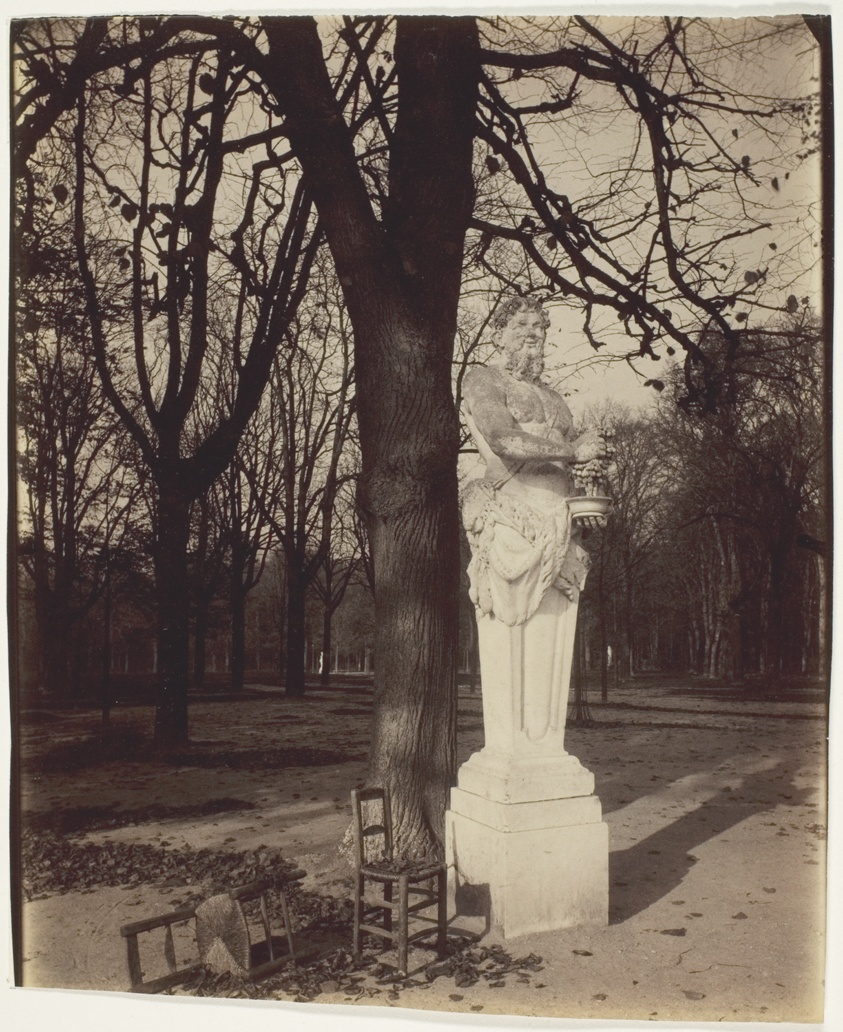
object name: Photograph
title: Versailles, Coin de Parc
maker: Jean-Eugène-Auguste Atget (French, 1857–1927)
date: 1904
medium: Albumen print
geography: France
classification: albumen silver print; photographic process; photography; photograph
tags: Collected by Hugh Edwards